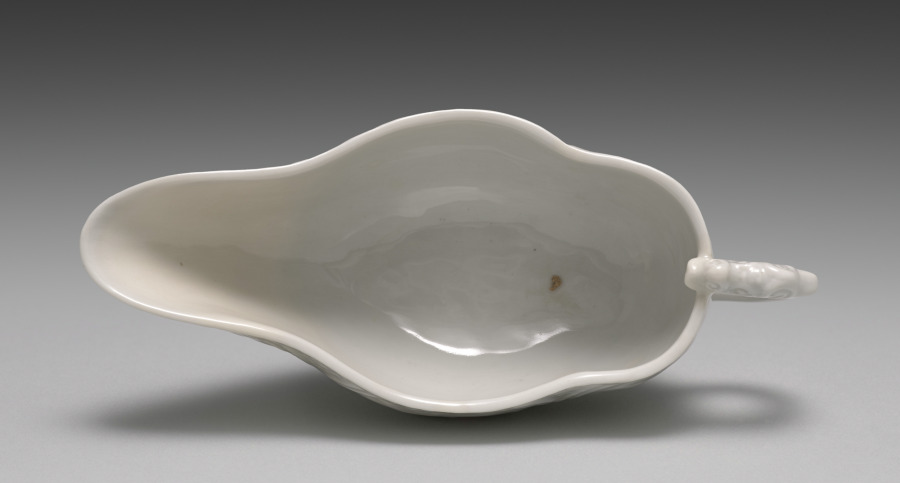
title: Water Cooler with Chinese Gardens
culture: Japan, Meiji period (1868–1912)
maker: Seifū Yohei III (Japanese, 1851–1914)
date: 1893–97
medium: Porcelain with molded and carved designs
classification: Ceramic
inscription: Artist's seal beneath the handle.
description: Unlike most pieces by the Seifu Yohei studio, this one bears a seal beneath the handle rather than on the base. The glaze and technique are identified on the box as taihakuji, or “great white porcelain,” an important early invention Yohei III devised in 1872 that involved the combination of a distinctive translucent, creamy glaze over an ivory-colored clay body. The body’s two sides have garden scenes seen through windows. Designs of flowers and butterflies are incised in the spaces at both ends. The garden on the right-hand side of the vessel, seen through a round window, has a decorative rock with grasses beneath a cloudy sky; and on a tiled veranda, there is a teapot as well as a fan and two scrolls inserted into a double-handled urn or kettle atop a brazier. The garden on the left-hand side has two enormous flowers below what may be either a cloud or a rippling pond; a garden rock—or perhaps a carved wood sculpture—with a circular perforation sits on what appears to be a veranda. While the details may be open to interpretation, the setting is a rather glamorous Chinese residence or palace with a superbly tended garden in spring or summer.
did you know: This water cooler has a handle with a dragon head.